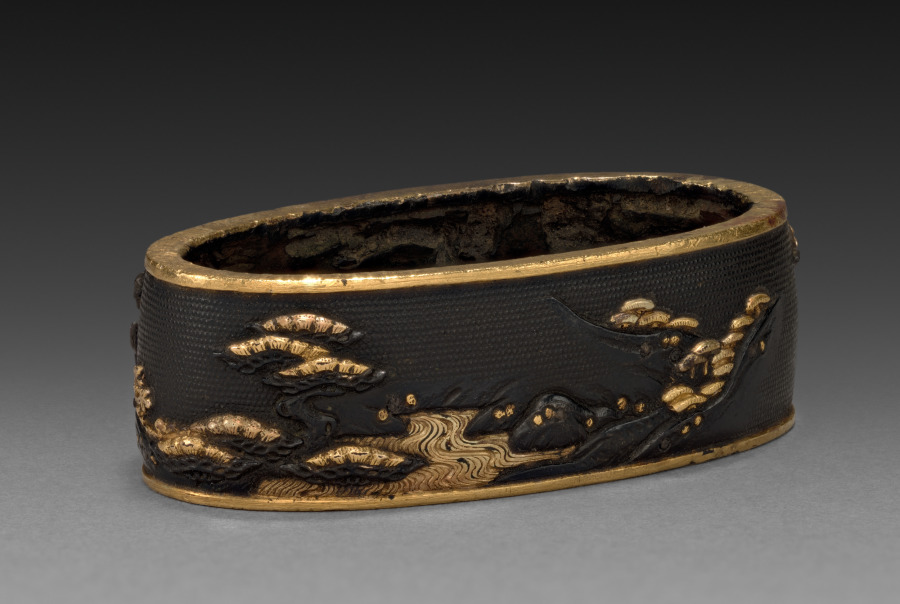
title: Sword-Hilt Collar (Fuchi)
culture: Japan, Edo period (1615–1868)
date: 1700–1850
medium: shakudo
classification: Arms and Armor